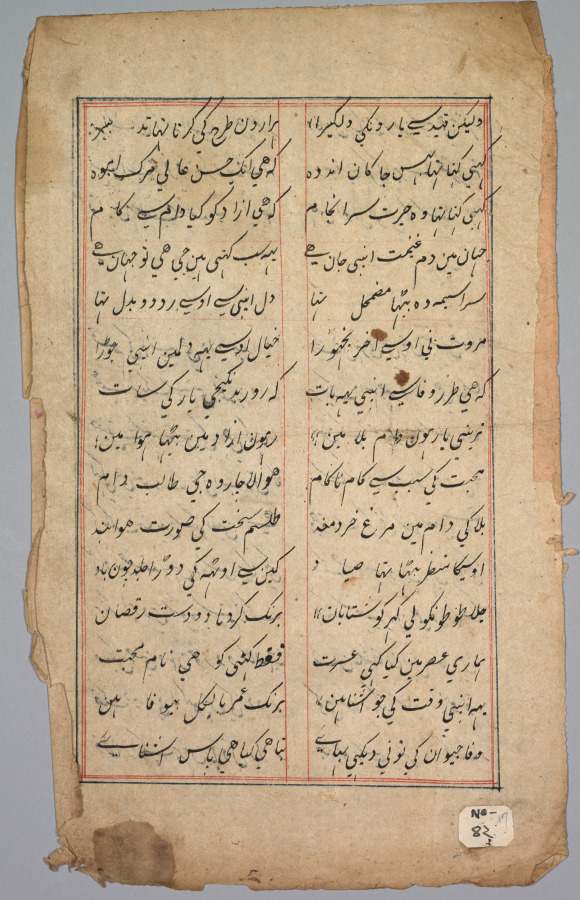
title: Page with Two Columns of Persian Writing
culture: India, Mughal Dynasty (1526-1756)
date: 18th century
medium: ink on paper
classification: Manuscript